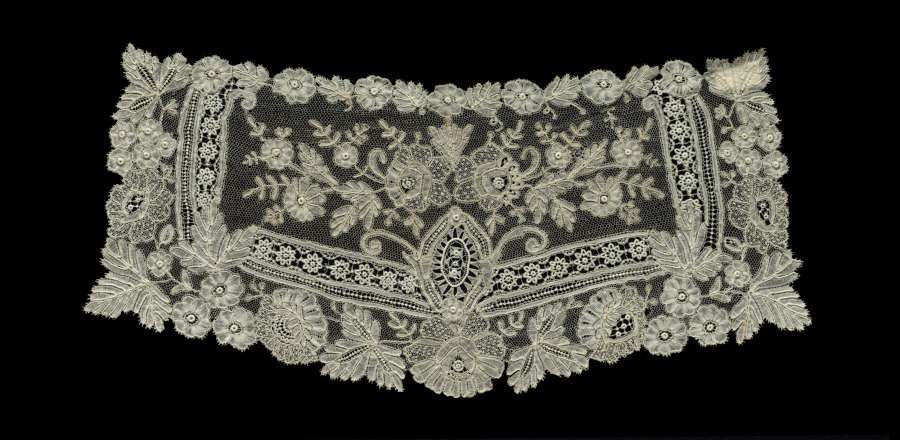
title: Lace Cuff (one of a pair)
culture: Belgium, Brussels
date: 1900–1935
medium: Linen: needle and bobbin lace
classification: Lace